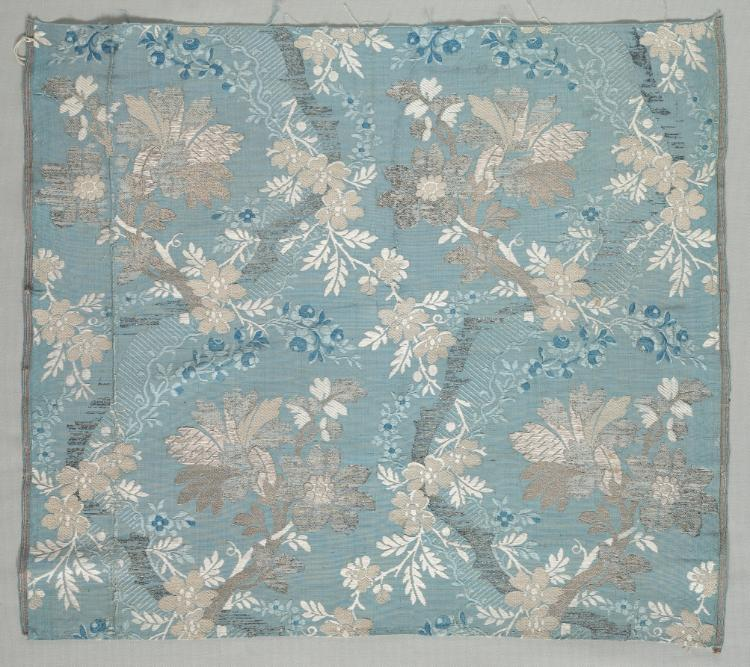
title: Fragment of Brocade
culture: France, 18th century, Period of Louis XV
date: c. 1750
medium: tabby, brocaded; silk and silver filé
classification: Textile